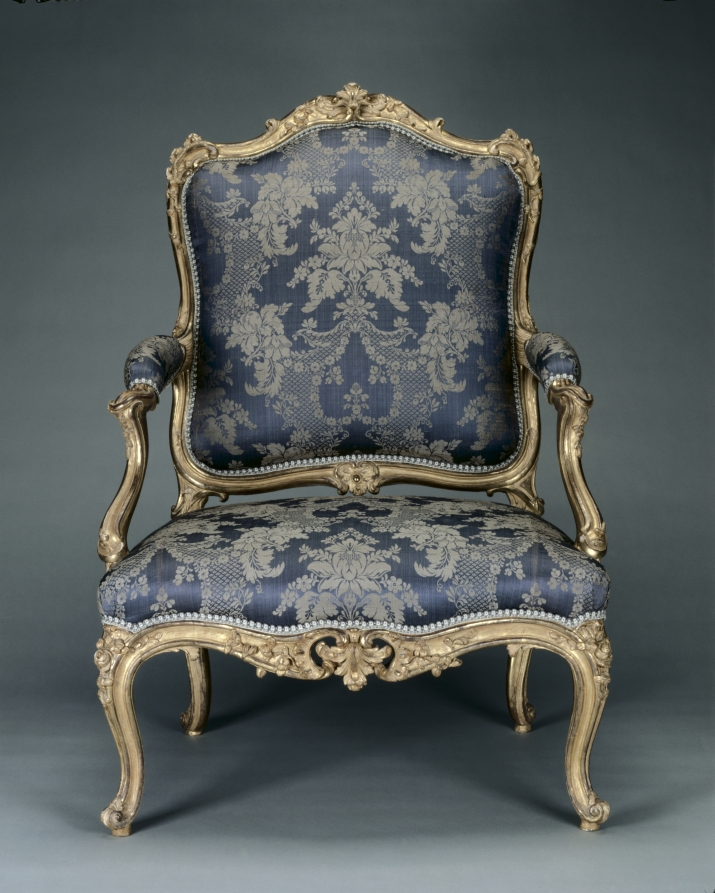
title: Armchair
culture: France, 18th century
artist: attributed to Nicolas Heurtaut (French, 1720–1771)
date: c. 1755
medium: carved and gilded wood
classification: Furniture and woodwork